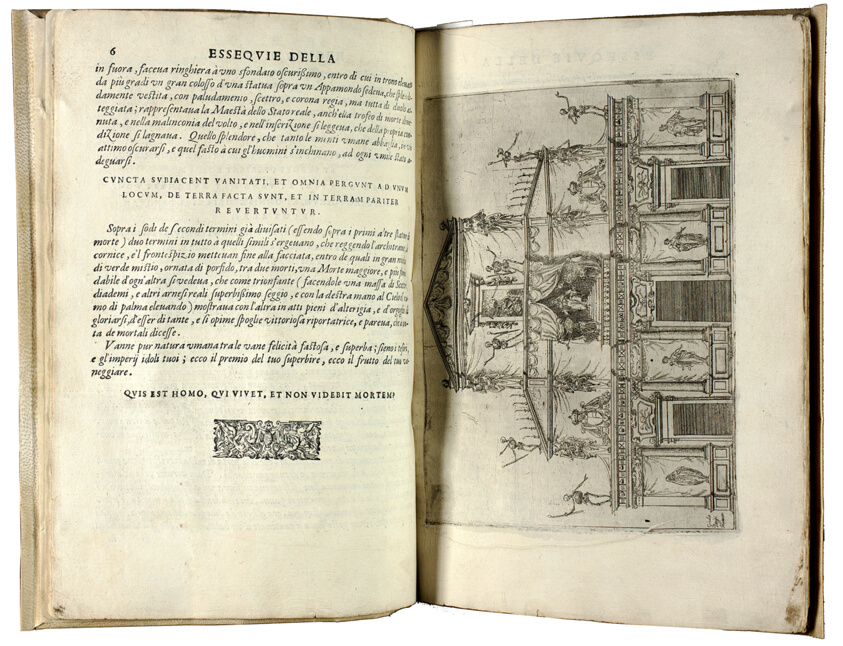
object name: Book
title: Funeral of the Holy Catholic and Royal Majesty Margaret of Austria Queen of Spain (Essequie della Sacra Cattolica e Real Maesta di Margherita d'Austria Regina di Spagna)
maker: Jacques Callot (French, 1592-1635), Giulio Parigi (Italian, 1571-1635), Antonio Tempesta (Italian, 1555-1630), and Raffaello Schiaminossi (Italian, c. 1529-1622); written by Giovanni Altoviti (Italian, 17th century); published by Bartolommeo Sermartelli e Fratelli (Italian, 17th century)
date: 1612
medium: Book with twenty-nine etchings with woodcut and letterpress in black on cream laid paper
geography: France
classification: book; paper; prints and drawing